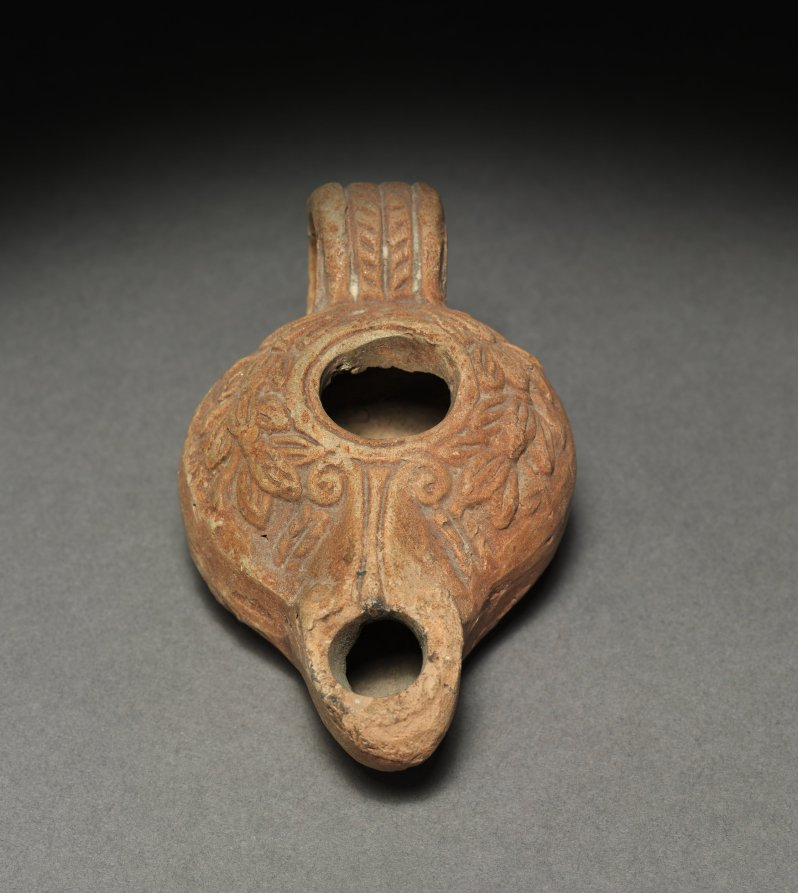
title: Lamp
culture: Parthian Empire (247 BCE–224 CE)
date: 1–200 CE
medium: terracotta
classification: Ceramic